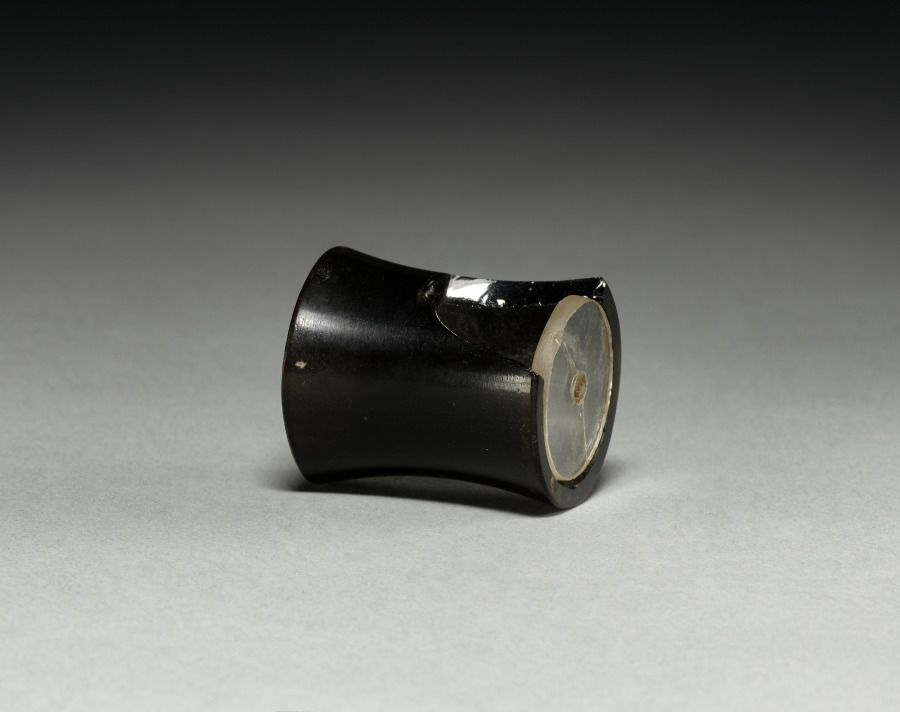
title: Ear Ornament (2 of 2)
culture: Mexico, Guerrero, Ichcatiopan, Mixtec or Aztec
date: c. 1200–1519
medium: obsidian, crystal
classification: Jewelry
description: This set of ear ornaments was reputedly found together with the gold and jade pectoral ornament shown nearby. They may have accompanied a noble burial, or perhaps constituted an offering deposit.